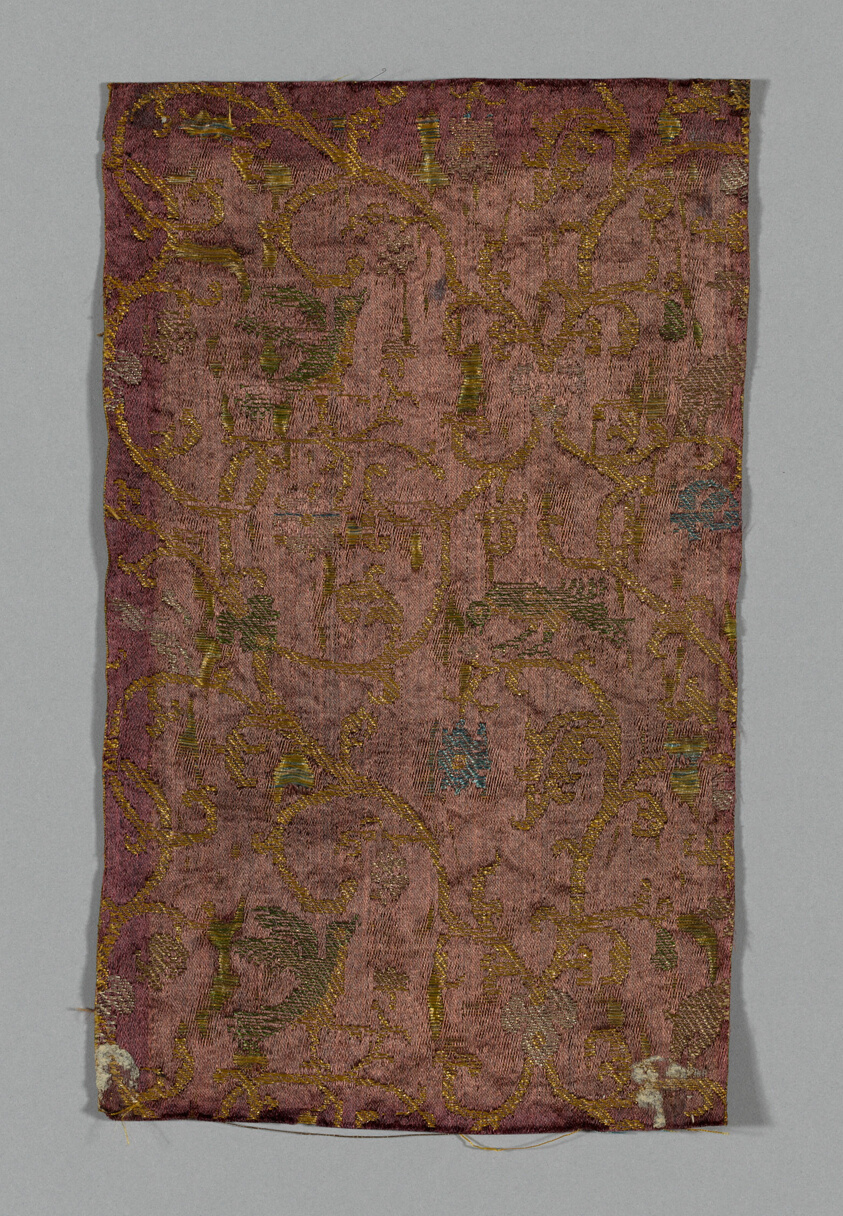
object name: Textile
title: Fragment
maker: Spain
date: c. 1600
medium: Satin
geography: Spain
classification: textile; weaving